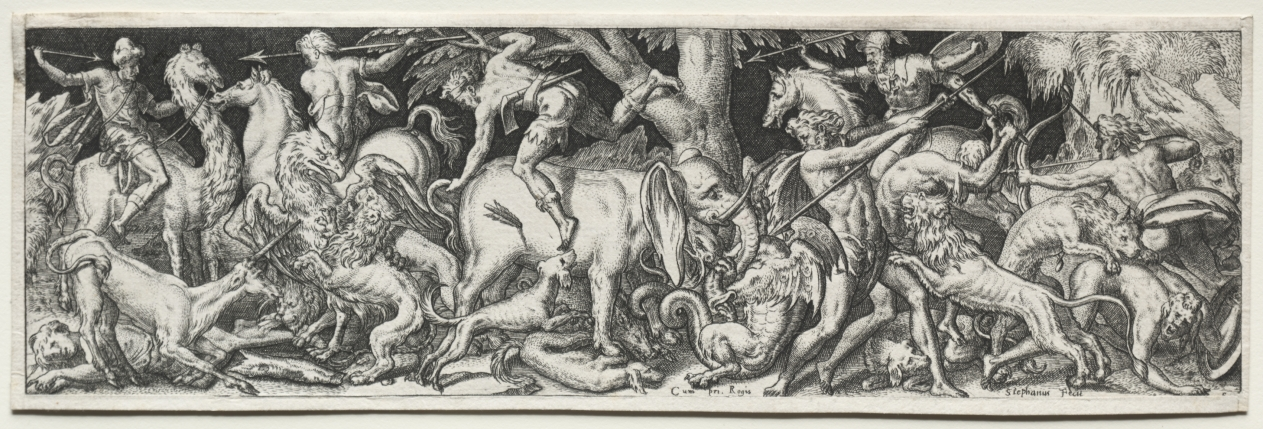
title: Combats and Triumphs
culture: France, 16th century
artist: Etienne Delaune (French, 1518/19-c. 1583)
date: c. 1550–72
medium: engraving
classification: Print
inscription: lower center, in plate: Cum pri. Regis ; lower right, in plate: Stephanus Fecit ; lower right, in plate: S ; verso, lower right, in graphite: 286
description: Etienne Delaune (French, 1518/19-1583) Combats and Triumphs, probably 1560s Engravings Gift of Leonard C. Hanna 1924.671-.674 The Triumph of Bacchus Battle of Men and Animals Combat of the Naked Men Battle of the Centaurs and the Lapiths The four prints shown here come from a series of twelve known as the Combats and Triumphs. The friezelike composition reflects the artist's study of marble relief carvings on Greek and Roman sarcophagi (coffins), here reduced to a preciously small setting. Against a flat, stagelike background, Delaune's balletic warriors engage in a Mannerist version of artificial war. Etienne Delaune was inspired by the art created at Fontainebleau, but he worked in Paris and then Strasbourg during the late 1500s. His small, exquisitely executed engravings reflect his training as a goldsmith and his work as a medallist.